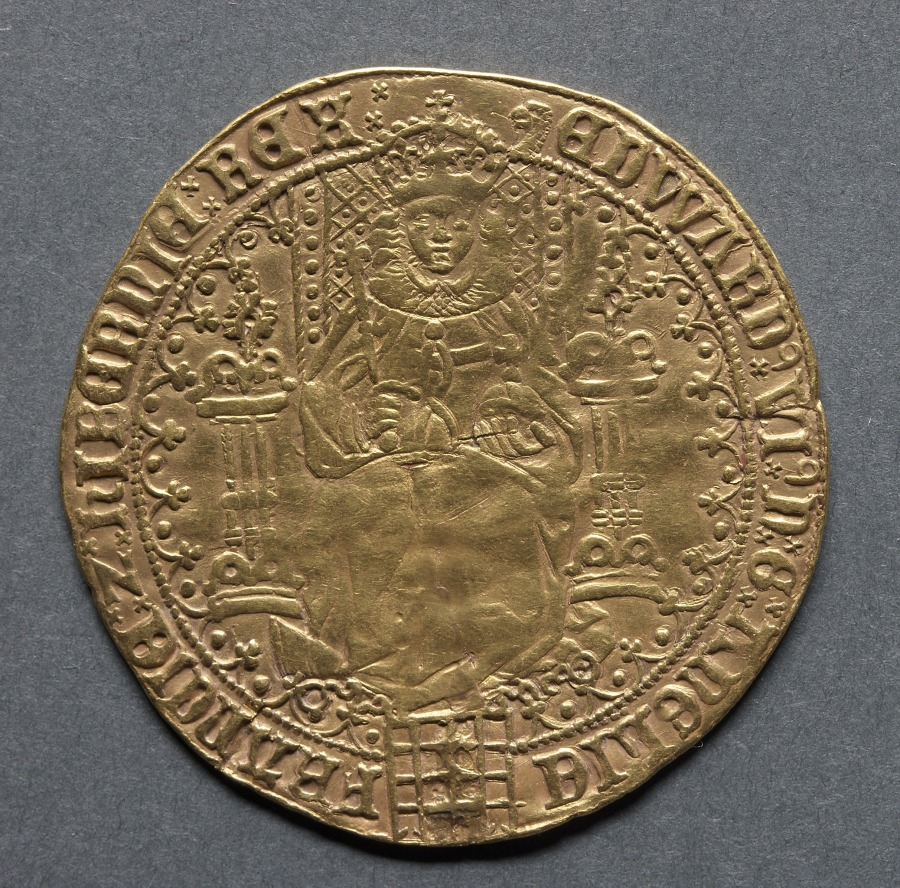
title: Sovereign of Thirty Shillings: Edward VI Enthroned (obverse); Shield of Royal Arms on Rose (reverse)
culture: England, Edward VI, 1547-1553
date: 1550–53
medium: gold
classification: Coins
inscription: EDWARD VI DG ANGILE FRAN DIE Z HIBERNIAE REX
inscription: IHESV AVTEM TRANSIENS PER MEDIVM ILLOVM IBAT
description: This extremely rare coin was struck at the Tower mint during the last period of the reign (1550–53). It was struck in high quality gold of 23 carat 3 1/2 grains, and the mint mark, an ostrich head, is unusual and unknown outside this coinage. The mint mark can be see on the obverse, above Edward's crown and before the text starts.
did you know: The reverse shield of arms shows three fleurs-de-lis for France and three lions for England, each repeated.